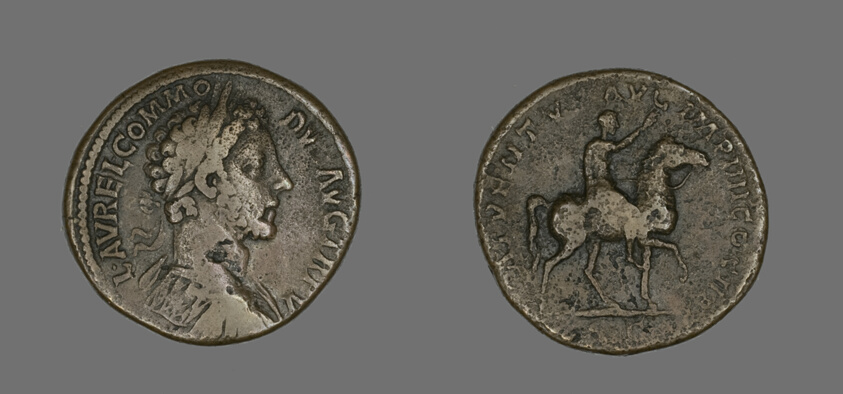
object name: Coin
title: Sestertius (Coin) Portraying Emperor Commodus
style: roman (ancient, style or period)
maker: Roman, minted in Rome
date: December 179-December 180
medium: Bronze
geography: Roman Empire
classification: coin; ancient art